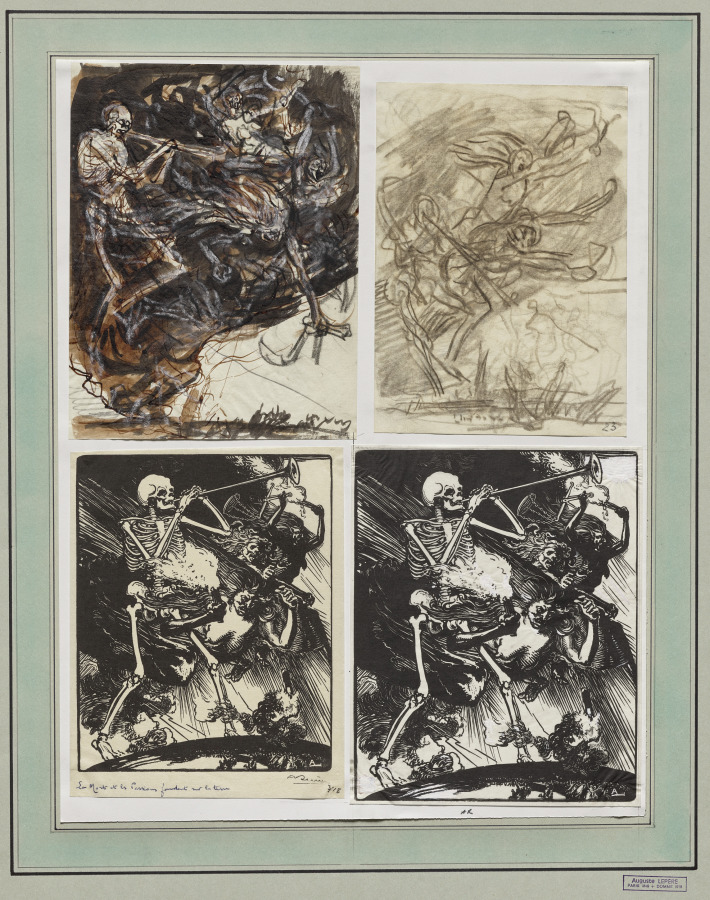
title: La Mort et les Passions fondant sur la terre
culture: France, 20th century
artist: Auguste Louis Lepère (French, 1849–1918)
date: 1914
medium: black crayon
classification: Drawing